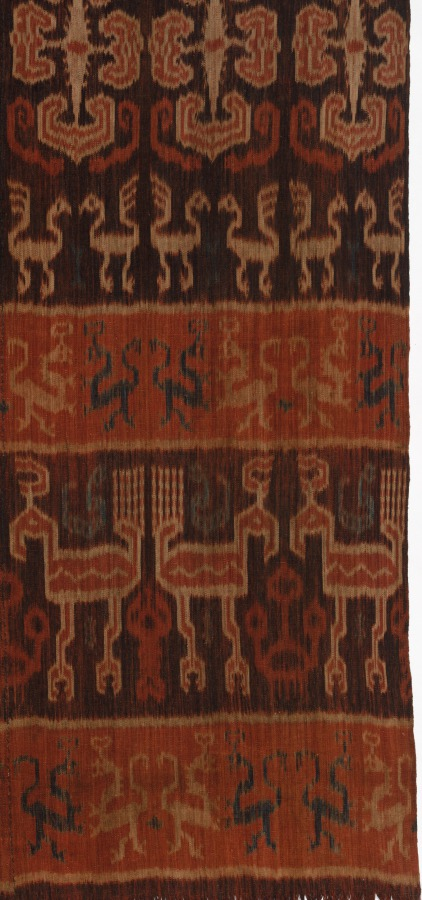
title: Hinggi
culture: Indonesia, Sumba, 19th century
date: 1800s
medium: warp ikat; cotton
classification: Textile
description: Hinggi are large mantles woven in identical pairs, one worn around the waist and the other draped over the shoulder. As is characteristic of Sumbanese "hinggi," the design of this mantle relates to the traditional animistic religious and social structure of Sumba: the division of the cloth into horizontal bands reflects the layout of the traditional Sumbanese village, the rampant lions denote royal power, the trees of life between the cockatoos are symbols of fertility, and the geometric figure repeated across the center of the cloth is a symbol of royalty.